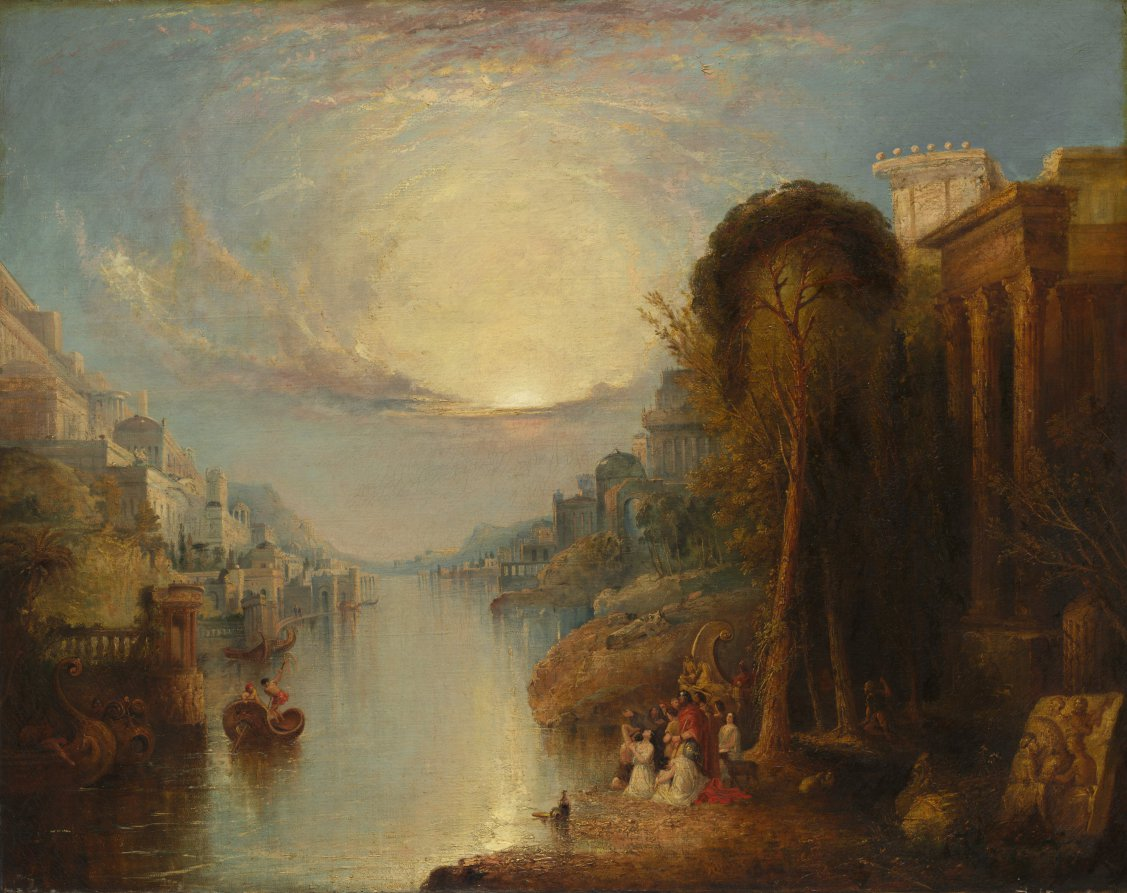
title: Carthage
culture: England, 19th century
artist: attributed to William Linton (British, 1791–1876)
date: c. 1830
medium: oil on fabric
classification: Painting